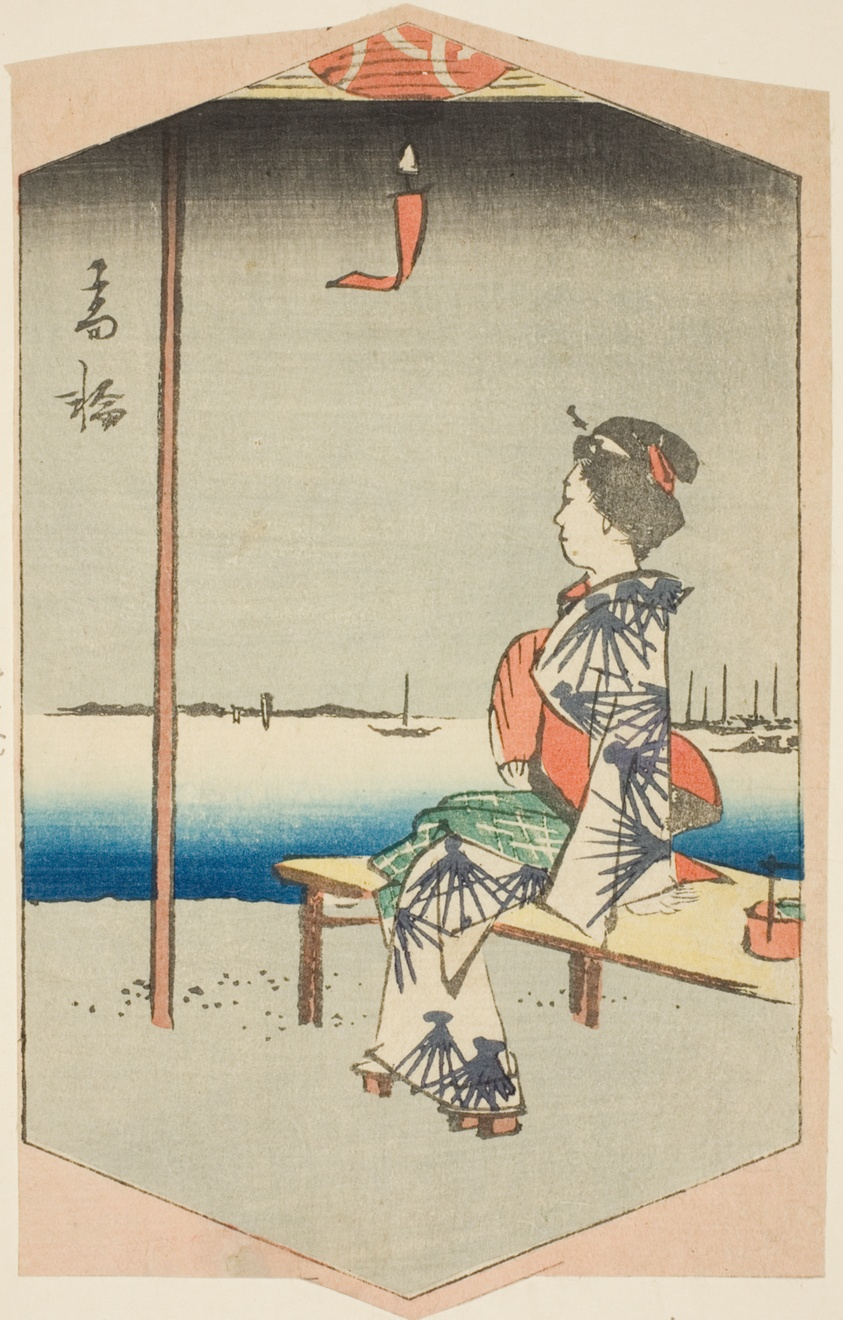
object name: Print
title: Takanawa, section of a sheet from the series "Cutout Pictures of Famous Places in Edo (Edo meisho harimaze zue)"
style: Japanese (culture or style)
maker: Utagawa Hiroshige 歌川 広重; Japanese, 1797-1858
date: 1857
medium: Color woodblock print; section of harimaze sheet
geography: Japan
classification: woodblock print; print; asian art